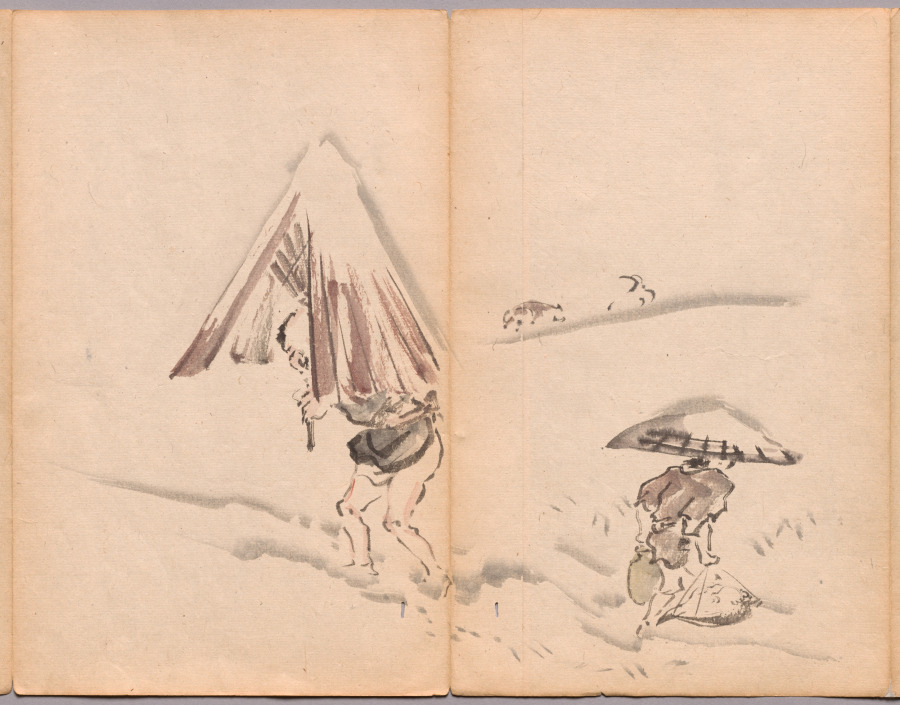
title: Figures in Snow from Sketch Album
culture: Japan, Edo period (1615–1868) to Meiji period (1868–1912)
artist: Kawanabe Kyōsai (Japanese, 1831–1889)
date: mid- to late 1800s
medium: Accordion-style book of 26 double-leaves; ink and color on paper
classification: Bound Volume